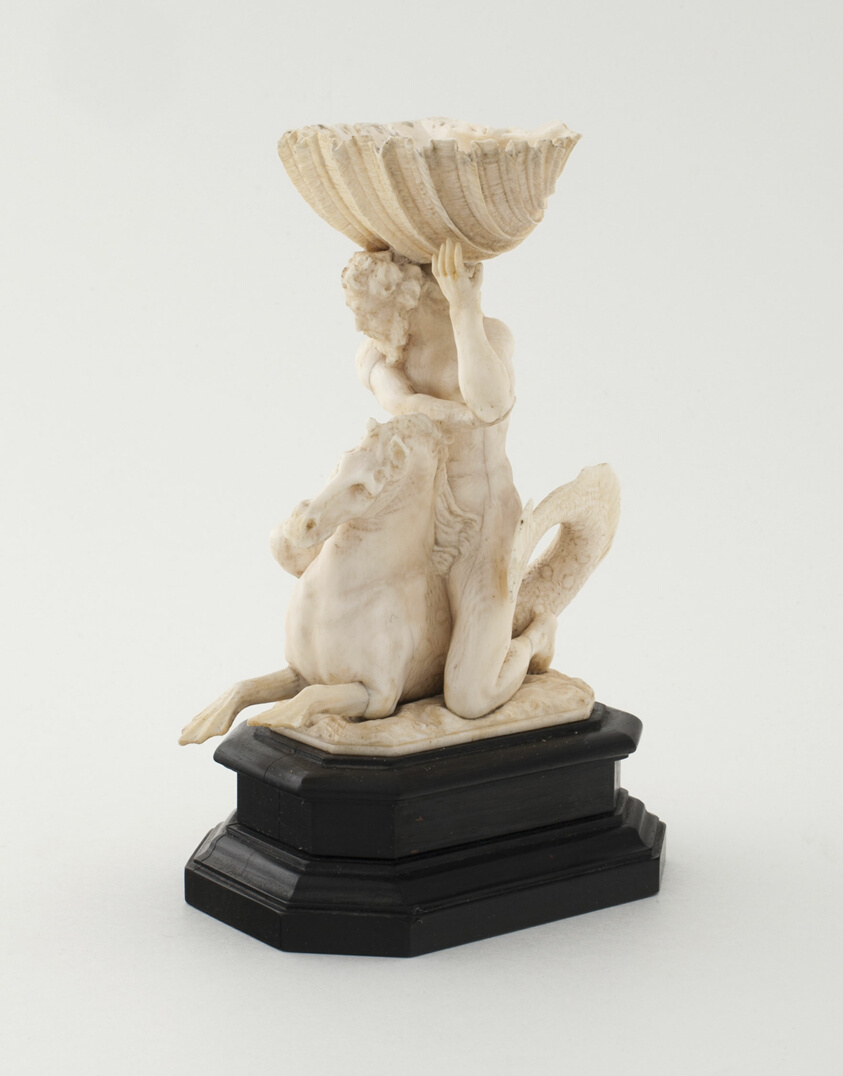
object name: Decorative Arts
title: Salt Cellar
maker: Belgium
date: 1625/75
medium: Ivory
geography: Belgium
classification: functional object; sculpture; decorative arts